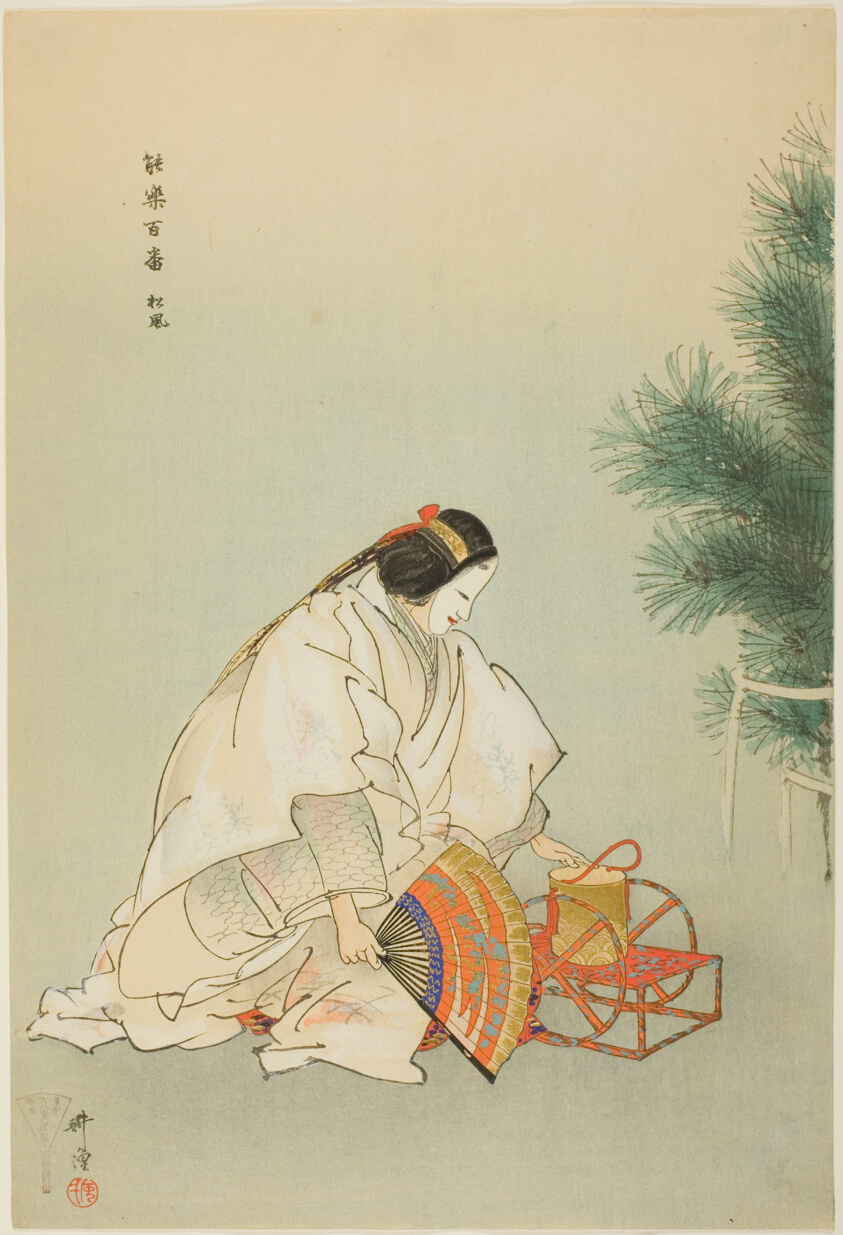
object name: Print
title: Matsukaze, from the series "One Hundred No Dramas (Nogaku hyakuban)"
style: Japanese (culture or style)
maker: Tsukioka Kogyo; Japanese, 1869-1927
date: 1898/1903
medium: Color woodblock print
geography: Japan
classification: woodblock print; print; asian art